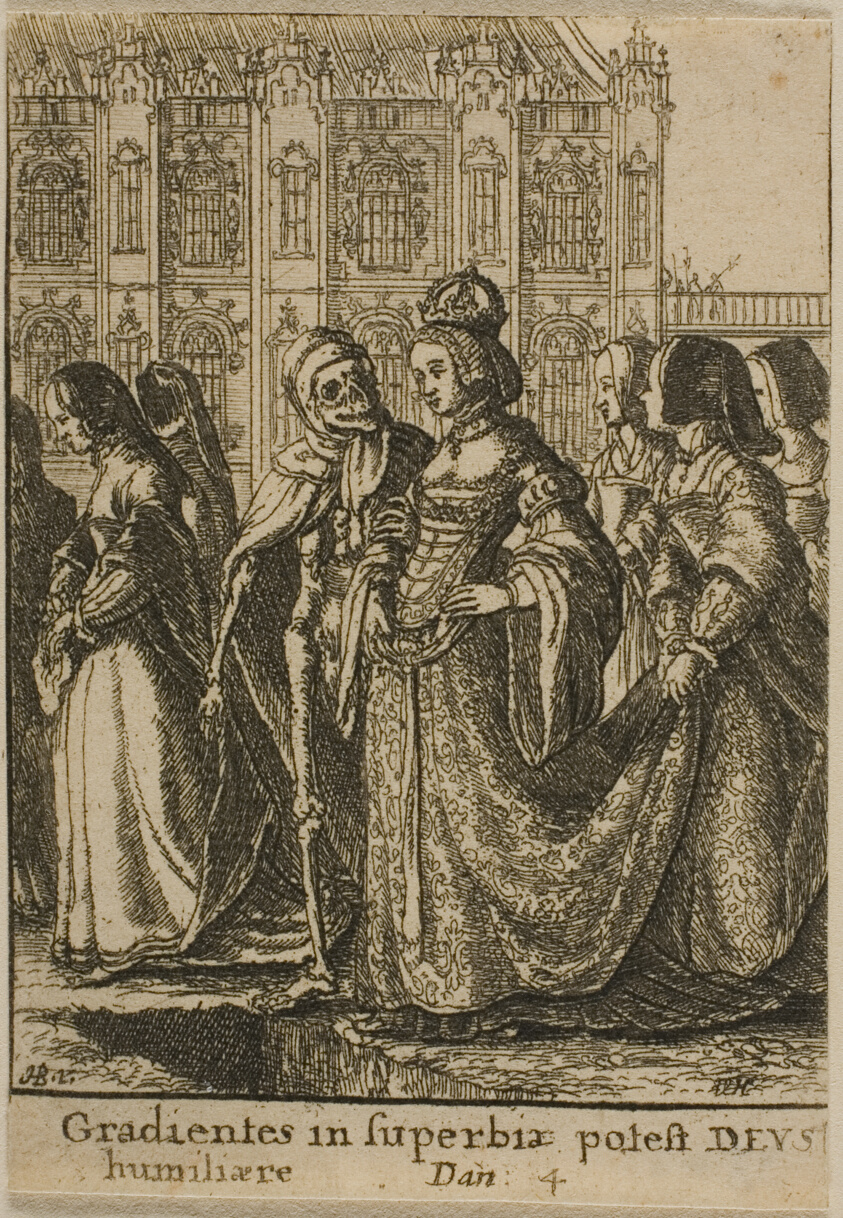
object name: Print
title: The Empress and Death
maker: Wenceslaus Hollar (Bohemian, 1607-1677); after Hans Holbein the younger (German, c.1497-1543)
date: 1651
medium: Etching on ivory wove paper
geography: Bohemia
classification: etching; print; prints and drawing